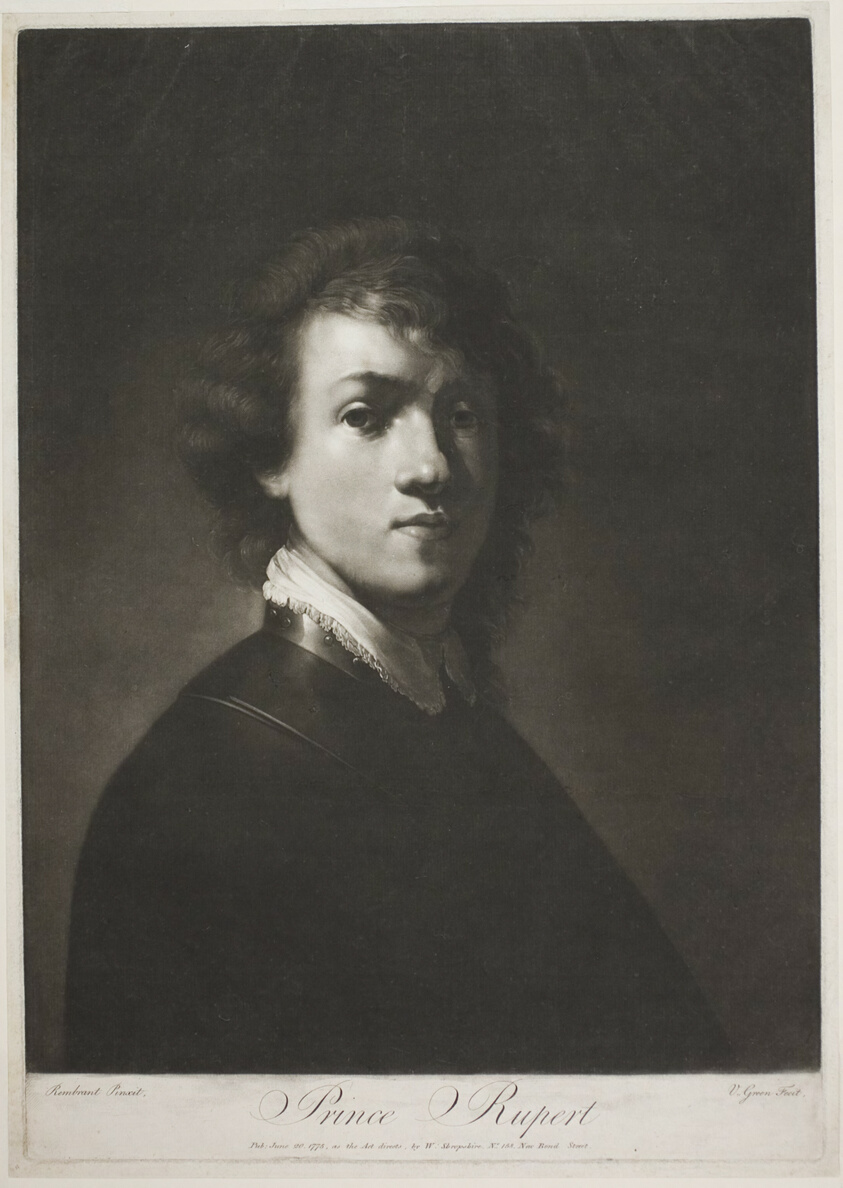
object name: Print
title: Prince Rupert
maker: Valentine Green (English, 1739-1813); after Rembrandt van Rijn (Dutch, 1606-1669)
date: 1775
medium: Mezzotint in black on cream laid paper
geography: England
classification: mezzotint; print; prints and drawing